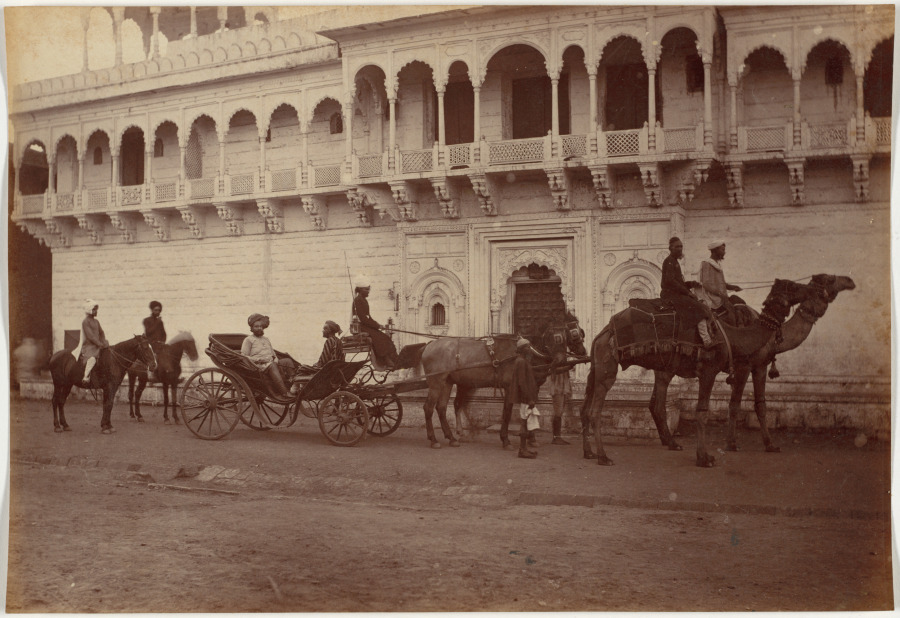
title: Ramkishore Singh of Rewa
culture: India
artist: Raja Deen Dayal (Indian, 1844–1905)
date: 1886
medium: albumen print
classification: Photograph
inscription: Stamped in black ink on verso: “3.7B”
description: Ramkishore Singh, likely a high-ranking official or merchant, is depicted twice in the album, each time aboard a luxurious type of transport. In one photograph, he rides atop an elephant, a creature associated with India, power, and fortitude, preceded by an attendant on horseback. In the other, he rides in a European-style carriage pulled by two horses, flanked by attendants on camels (native to parts of India) and horses. Like the images of Britons in their carriages and rickshaws, these depictions suggest the sitter’s wealth through his possession of servants, animals, and vehicles.